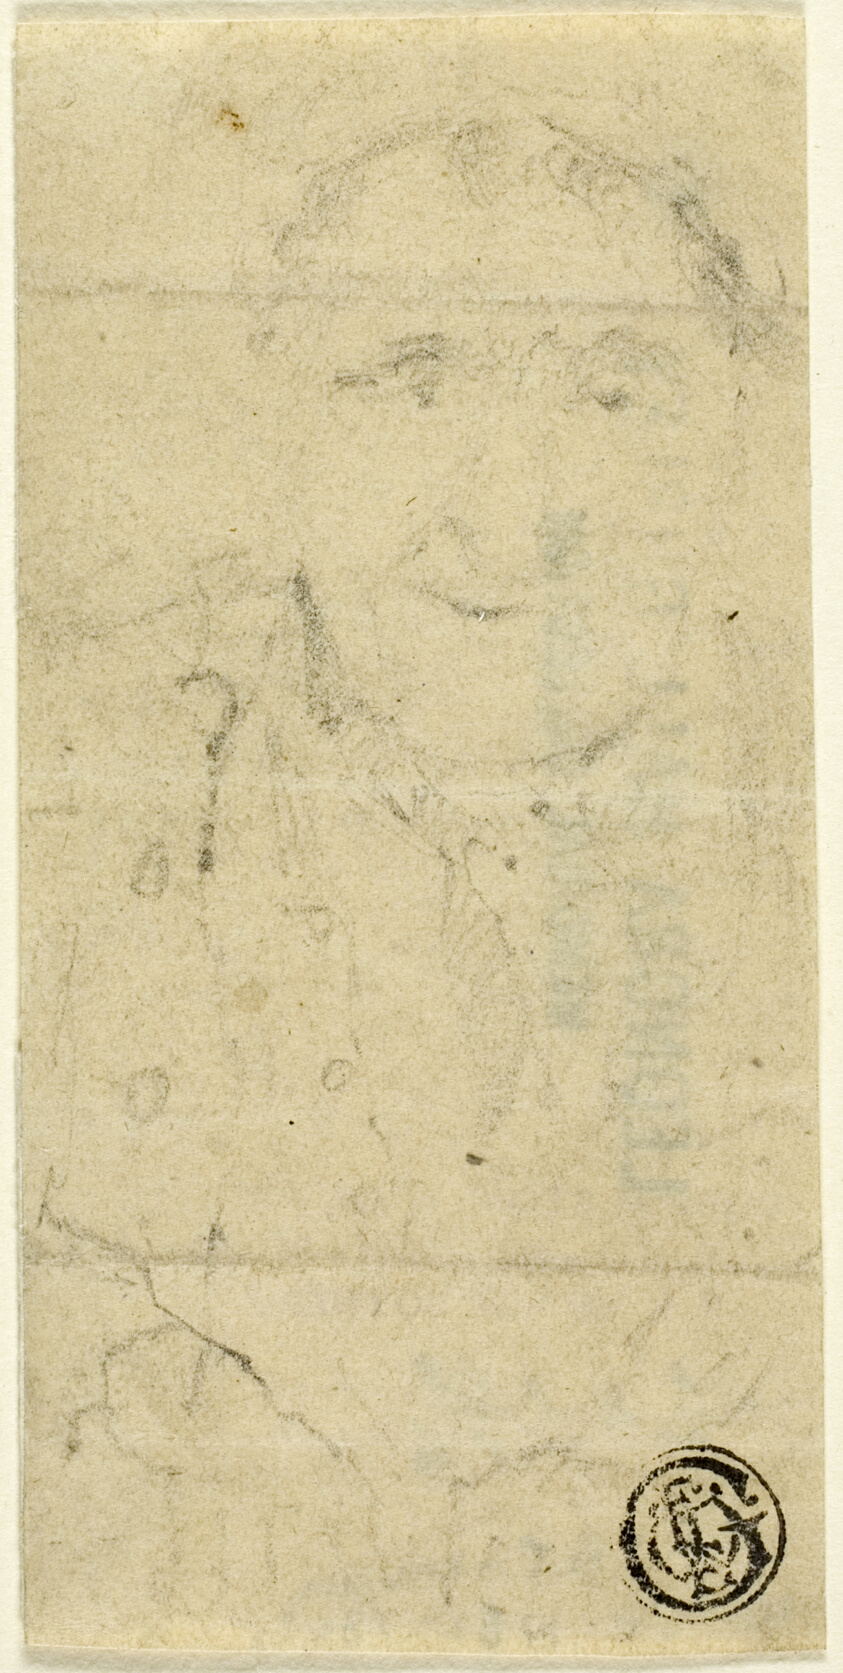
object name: Drawing and Watercolor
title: Portrait of a Man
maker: John Sell Cotman (English, 1782-1842)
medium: Graphite on cream wove paper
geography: England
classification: graphite; drawings (visual works); prints and drawing